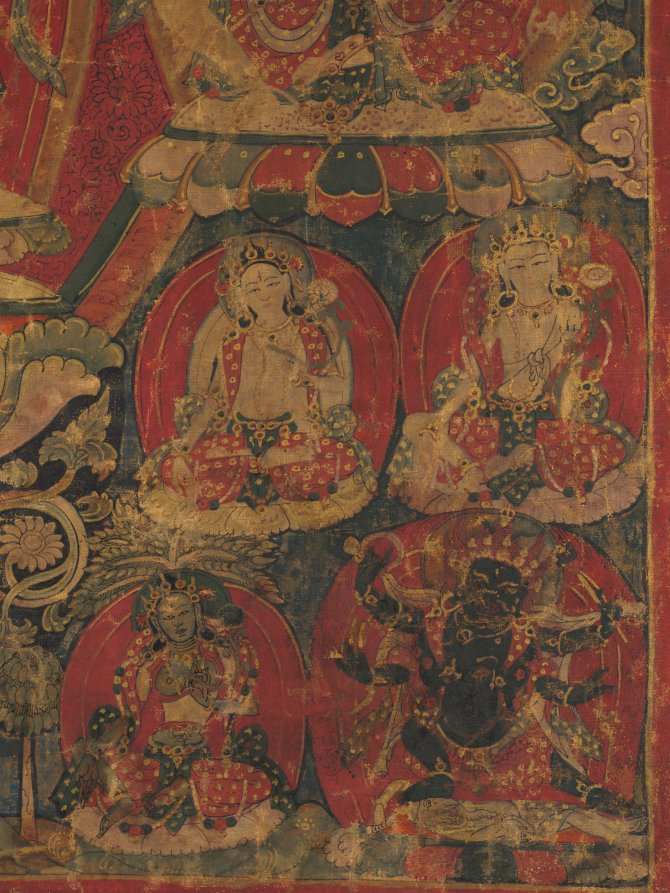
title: Eleven-Headed, Thousand-Armed Bodhisattva of Compassion (Avalokiteshvara)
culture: Western Tibet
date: c. 1500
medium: Gum tempera and ink on cotton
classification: Painting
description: One thousand arms surround the central figure like a radiating halo. Each hand has an eye in the palm to see the suffering of all beings, generating the sense of compassion that this figure embodies. The special form of the central image of the bodhisattva Avalokiteshvara derives from the mystic vision of a nun named Gelongma Palmo, who was born a Kashmiri princess, but prayed for leprosy to avoid having to marry and became an accomplished nun. While meditating in a cave, she achieved this vision of 11-headed, 1,000-armed Avalokiteshvara, who cured her leprosy and guided her on the path to enlightenment.